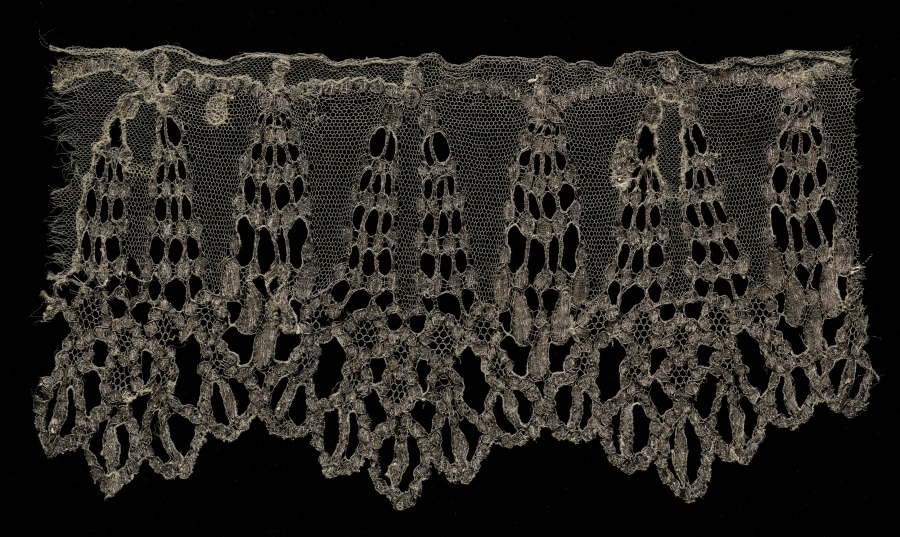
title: Lace Edging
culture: Spain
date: 1800s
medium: Silk and metallic thread: bobbin lace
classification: Lace